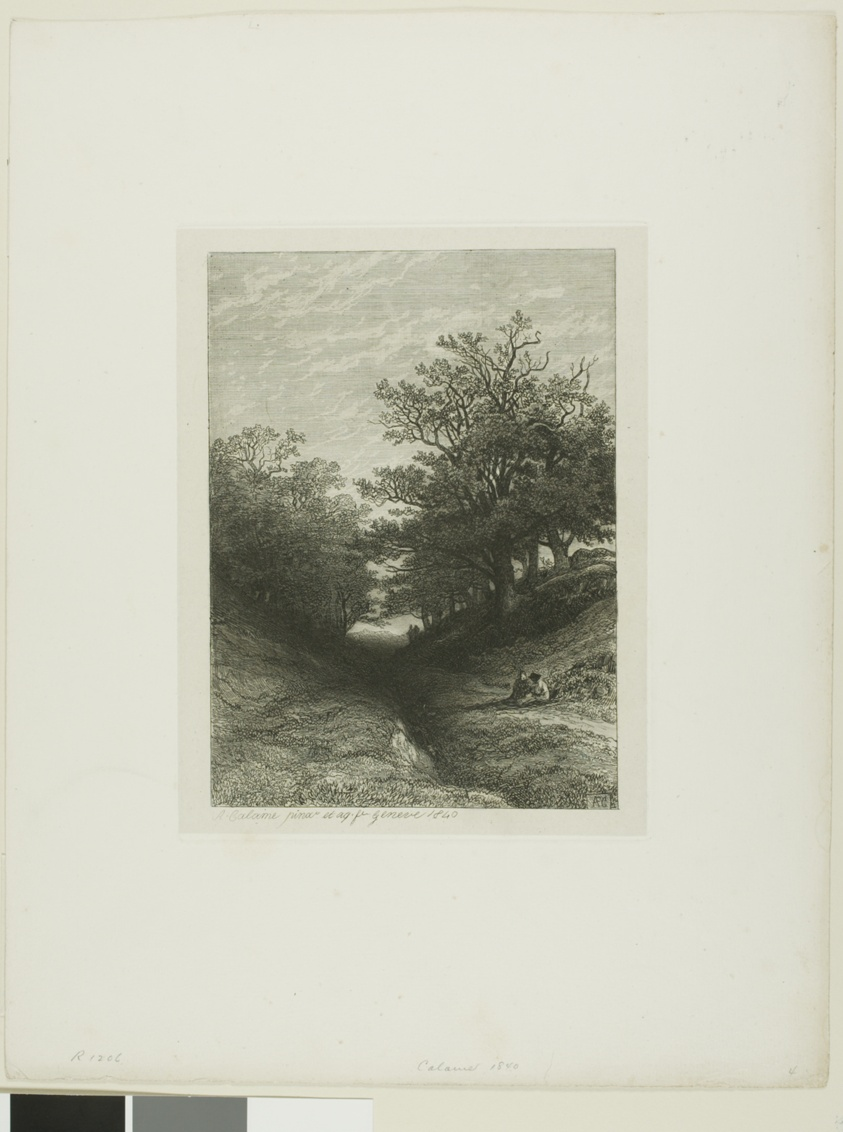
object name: Print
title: Alpine Landscape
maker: Alexandre Calame (Swiss, 1810-1864)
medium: Etching on paper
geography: Switzerland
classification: etching; print; prints and drawing